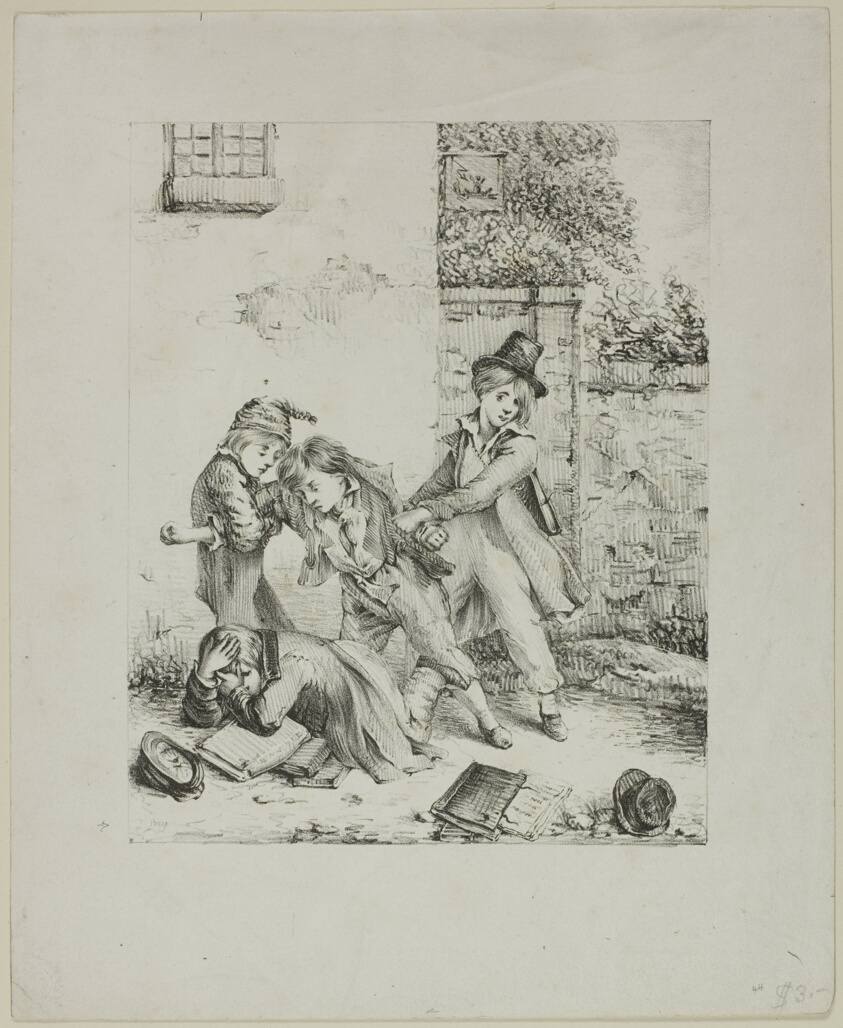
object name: Print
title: Schoolboys Fighting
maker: Auguste Bry (French, 19th century)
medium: Lithograph in black on off-white wove paper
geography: France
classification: lithograph; print; prints and drawing